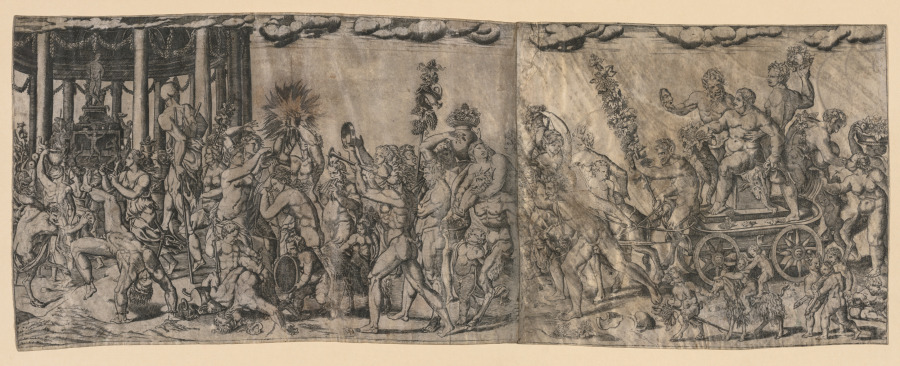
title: Bacchanalian Scene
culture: Italy, late 16th-early 17th Century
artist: Francesco Bertelli (Italian)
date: late 1500s-early 1600s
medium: engraving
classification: Print